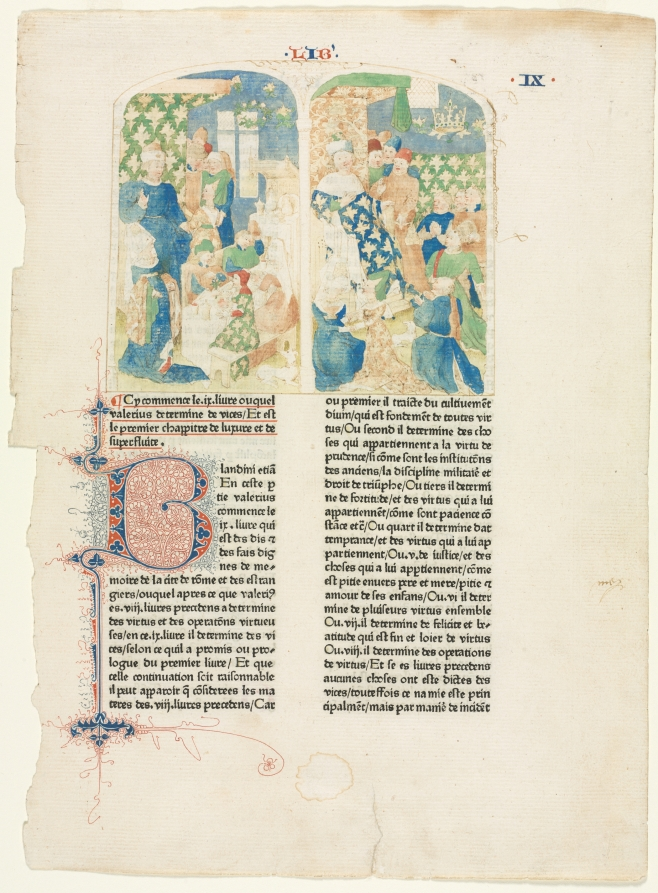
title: Opening Page of Book IX of Valerius Maximus's Facta et dicta memorabilia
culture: Flanders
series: Valerius Maximus's Facta et dicta memorabilia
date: c. 1476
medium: pen and brown ink, watercolor, and gouache; framing lines in brown ink [around image]; with letterpress text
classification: Drawing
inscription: lower right, in brown ink: [illegible]